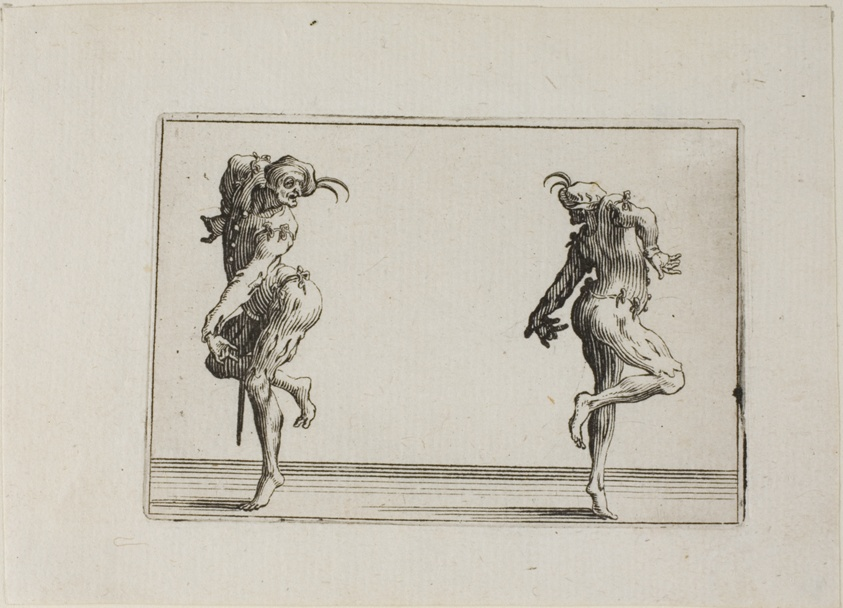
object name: Print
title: The Two Pantaloons Turning their Back, from The Caprices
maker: Jacques Callot (French, 1592-1635)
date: c. 1622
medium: Etching in black on ivory laid paper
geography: France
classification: etching; print; prints and drawing